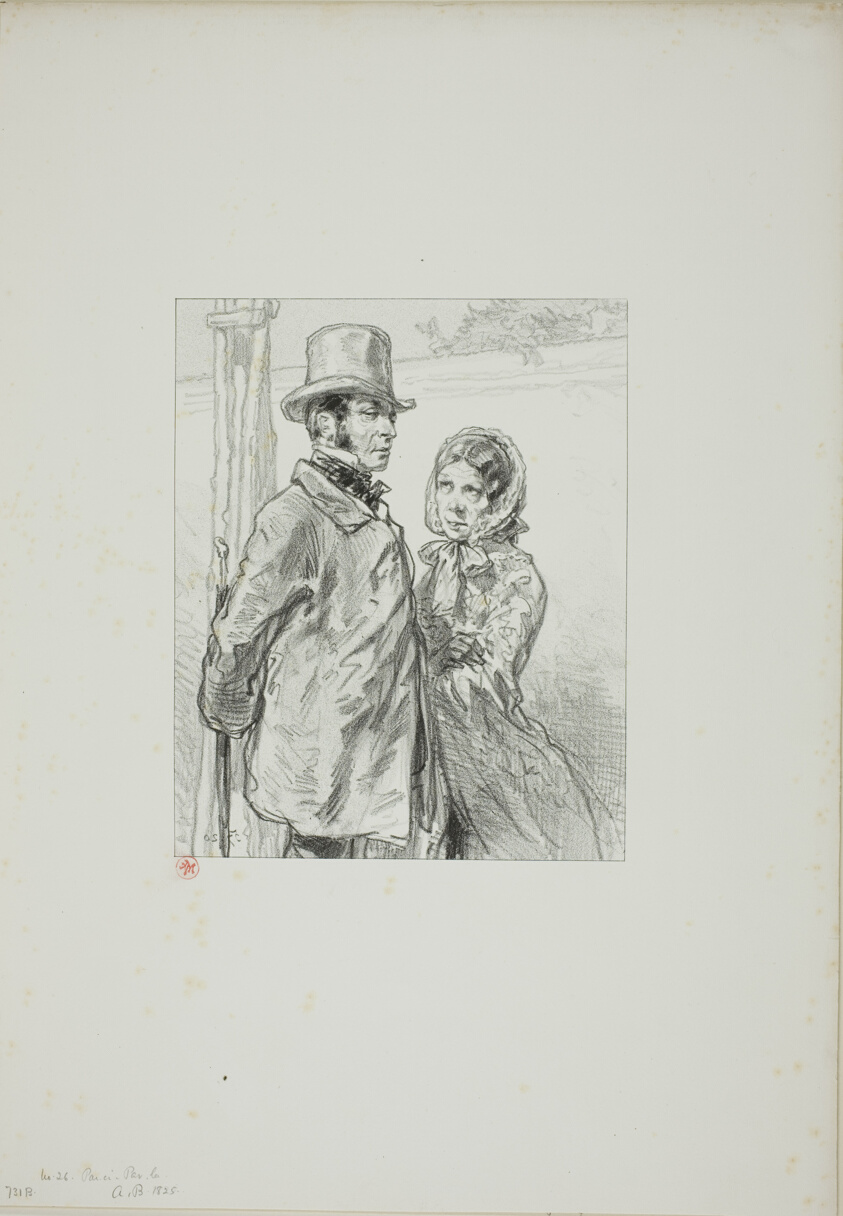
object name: Print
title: Masks and faces: Achille you don't ask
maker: Paul Gavarni (French, 1804-1866)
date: 1857–58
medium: Lithograph in black on ivory wove paper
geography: France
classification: lithograph; print; prints and drawing